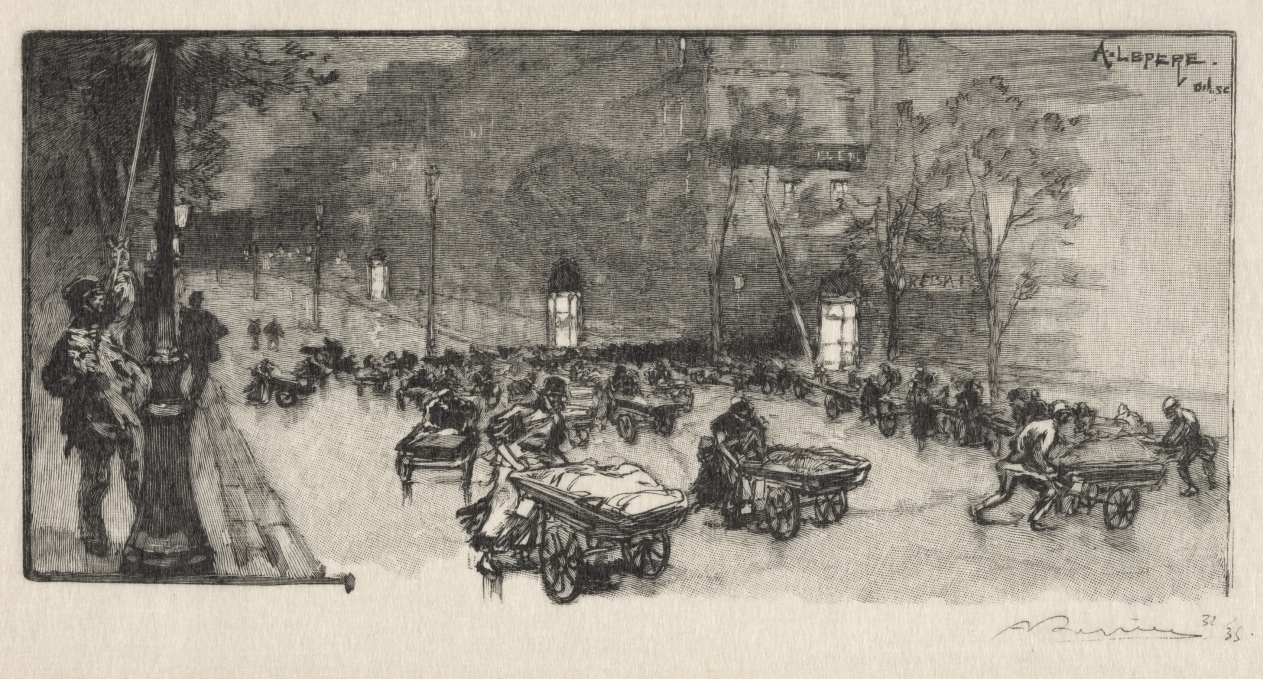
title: Le Boulevard, au coin du Fauborg Montmartre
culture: France, 19th century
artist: Auguste Louis Lepère (French, 1849–1918)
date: 1890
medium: wood engraving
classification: Print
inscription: inscribed in ink below image: A. Lepere 31/35 (l.r.); inscribed in plate: A. Lepere. /Del. Sc. (u.r.)